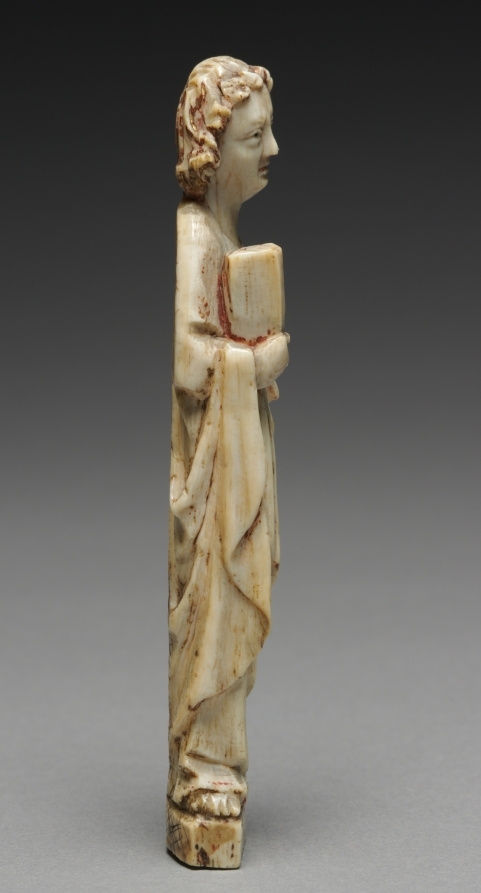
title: Saint John the Evangelist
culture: Germany or Moravia, 14th century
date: c. 1325–1330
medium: ivory with traces of paint and gilding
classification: Ivory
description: This figure with a Virgin and Crucified Christ (now lost) formed a Crucifixion group within a shrine.